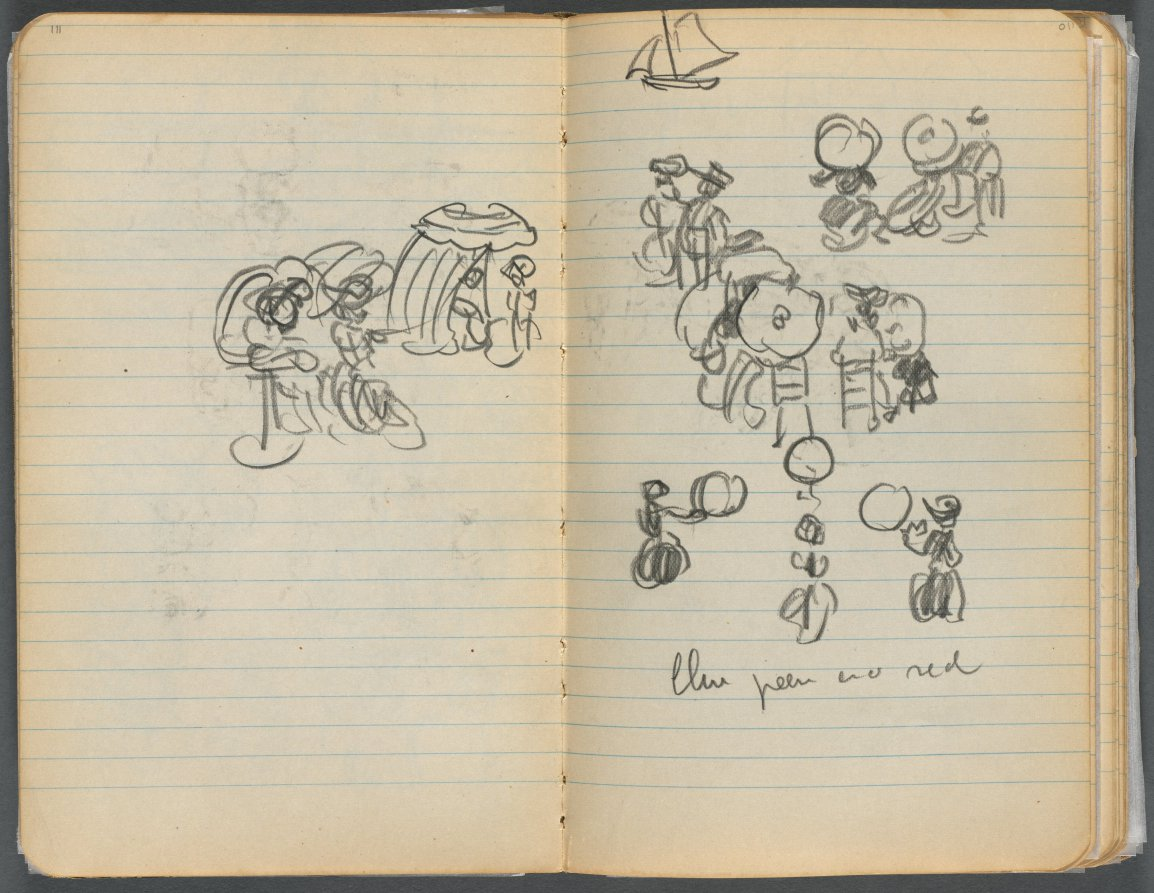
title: Sketchbook, page 110 &111: Study for Figures on a Beach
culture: America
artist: Maurice Prendergast (American, born Newfoundland [now Canada], 1858–1924)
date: 1905–10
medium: graphite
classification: Bound Volume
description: This sketchbook contains 69 pages of drawings, a diary largely devoted to the state of the artist's health, and a three-page discourse on the nature of genius and ideas.